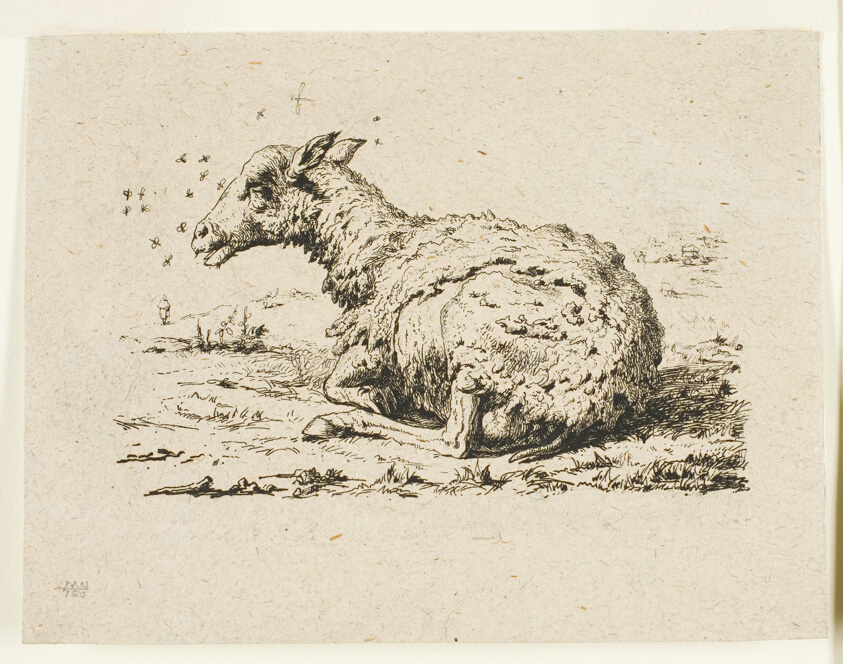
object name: Print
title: The Sheep and the Flies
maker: Charles Meryon (French, 1821-1868); after Karel Dujardin (Dutch, c.1622-1678)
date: 1849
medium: Etching on grayish tan laid China paper, laid down on ivory wove card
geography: France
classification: etching; print; prints and drawing